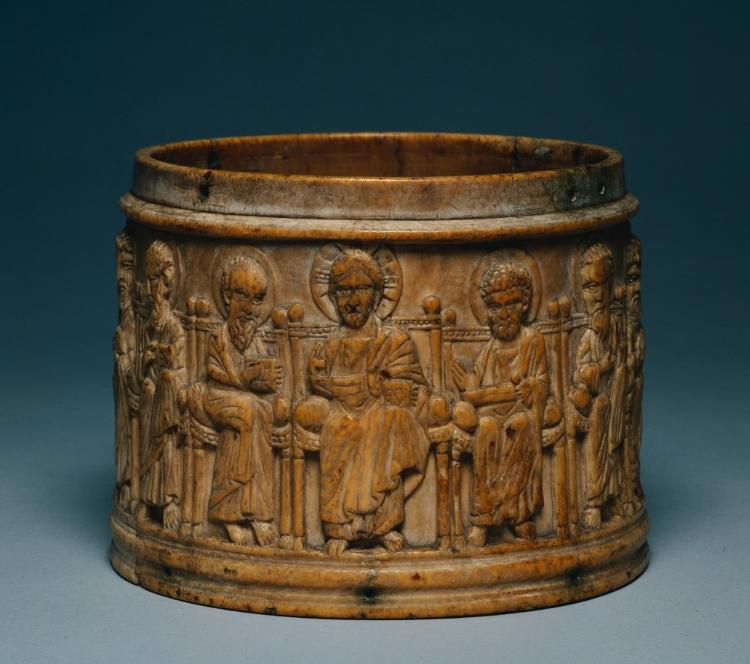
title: The "Apostles" Pyx (Box)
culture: Byzantium, Constantinople, middle Byzantine period, 10th-11th century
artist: probably by Triptych Group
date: c. 980–1010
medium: ivory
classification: Ivory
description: This pyx shows Christ as Pantokrator (Ruler of the World), the Apostles, and the Virgin as a continuous frieze of figures seated in high-backed chairs with cushions. The tapered lip of the body of the pyx was intended to dovetail into the missing lid. Because of its style, the box is thought to be from a workshop of ivory carvers called "The Triptych Group" active in Constantinople between about 950 and 1010. This is the only known pyx to survive from the Middle Byzantine period (about ad 843-1204).